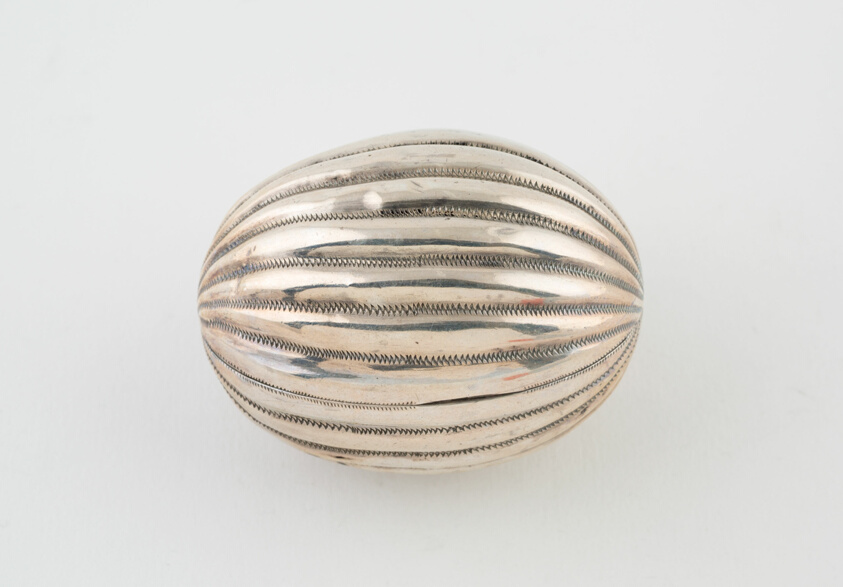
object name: Metalwork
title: Melon-Shaped Nutmeg Grater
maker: Possibly Continental Europe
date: c. 1840/50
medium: Silver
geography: Europe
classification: container for personal use; box; european decorative arts; metalwork; silver; decorative object/ornament